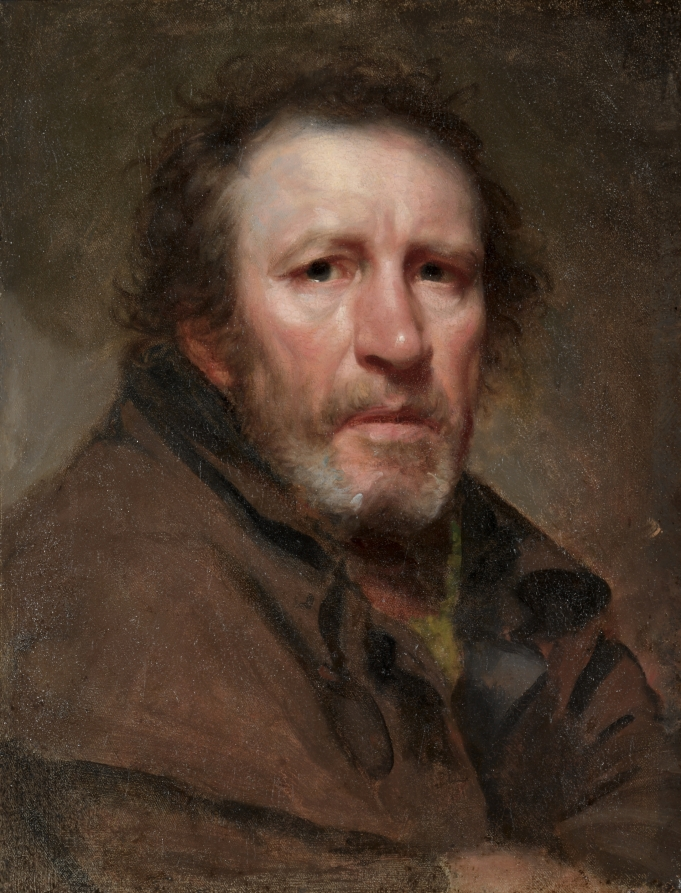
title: "Old Pat," The Independent Beggar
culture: America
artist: Samuel Lovett Waldo (American, 1783–1861)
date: c. 1819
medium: oil on wood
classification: Painting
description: With this study of a disheveled person—perhaps a man named Patrick MacGregor—the popular society portraitist Samuel Waldo challenged assumptions that successful New Yorkers may have made about their city's prosperity. Waldo sold many copies of an engraving portraying "Old Pat" and made a finished portrait of him called The Beggar's Dessert that included a meager bone and bowl as attributes. In this painting, the sitter's gaunt, careworn features suggest considering him in sympathetic terms, yet his forceful gaze presents him as someone who cannot easily be made into an object of pity.